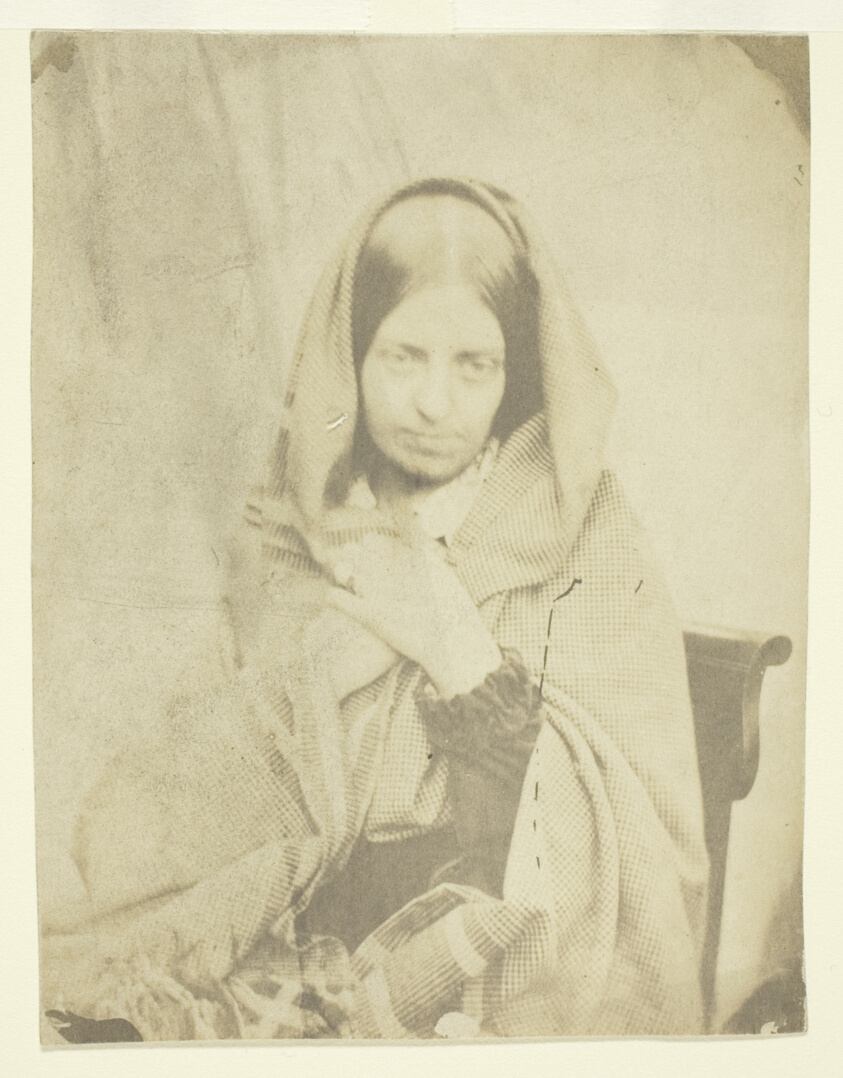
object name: Photograph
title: Mrs. Craik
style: 19th century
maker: Artist unknown, possibly Benjamin Mulock (English, 1829–1863); English, 19th century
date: 1850/59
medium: Calotype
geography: England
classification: salted paper print; photographic process; photography; photograph